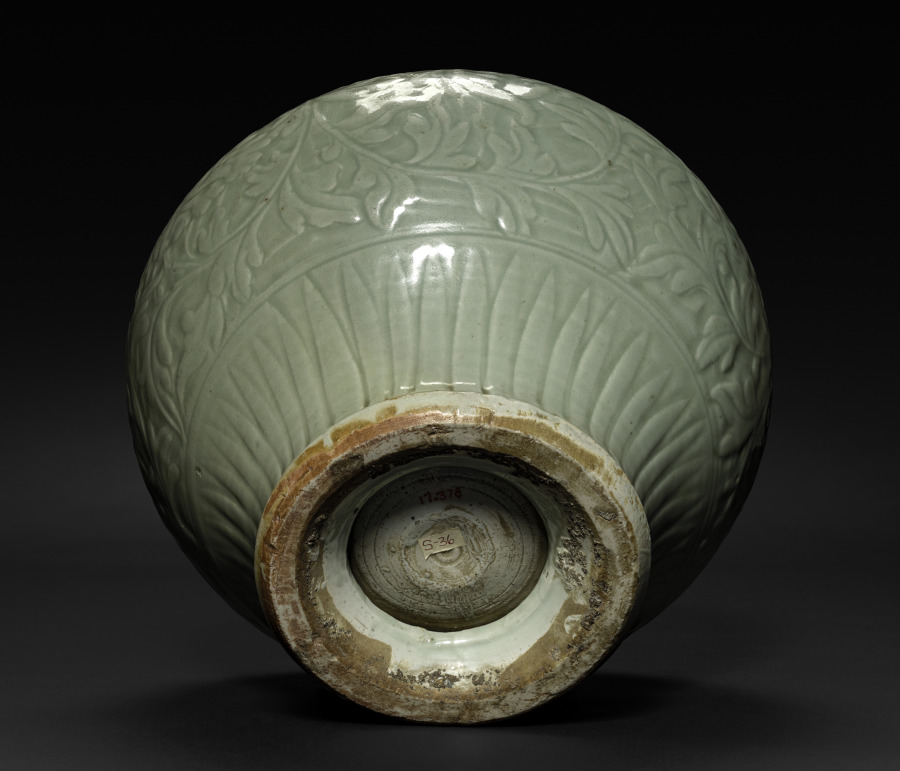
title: Jar: Celadon Ware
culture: China, Ming dynasty (1368–1644)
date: 1368–1644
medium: stoneware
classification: Ceramic